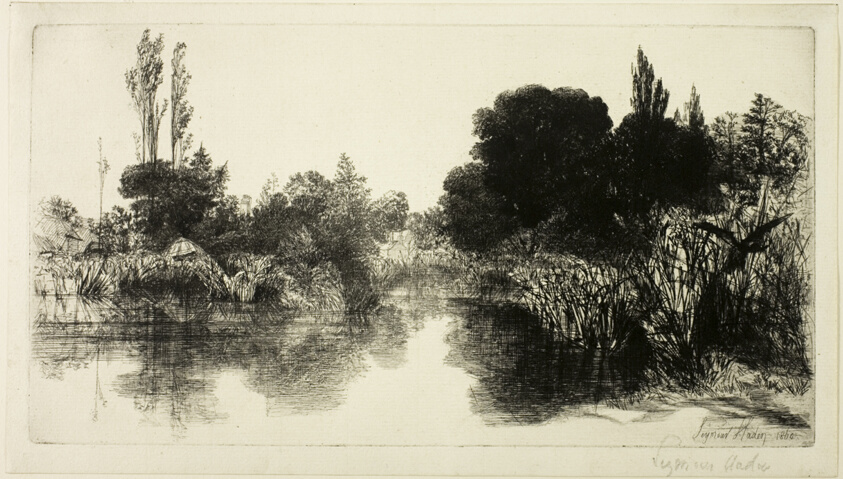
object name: Print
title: Shere Mill Pond, No. II (large plate)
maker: Francis Seymour Haden (English, 1818-1910)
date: 1860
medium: Etching with drypoint on ivory laid paper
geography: England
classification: etching; print; prints and drawing